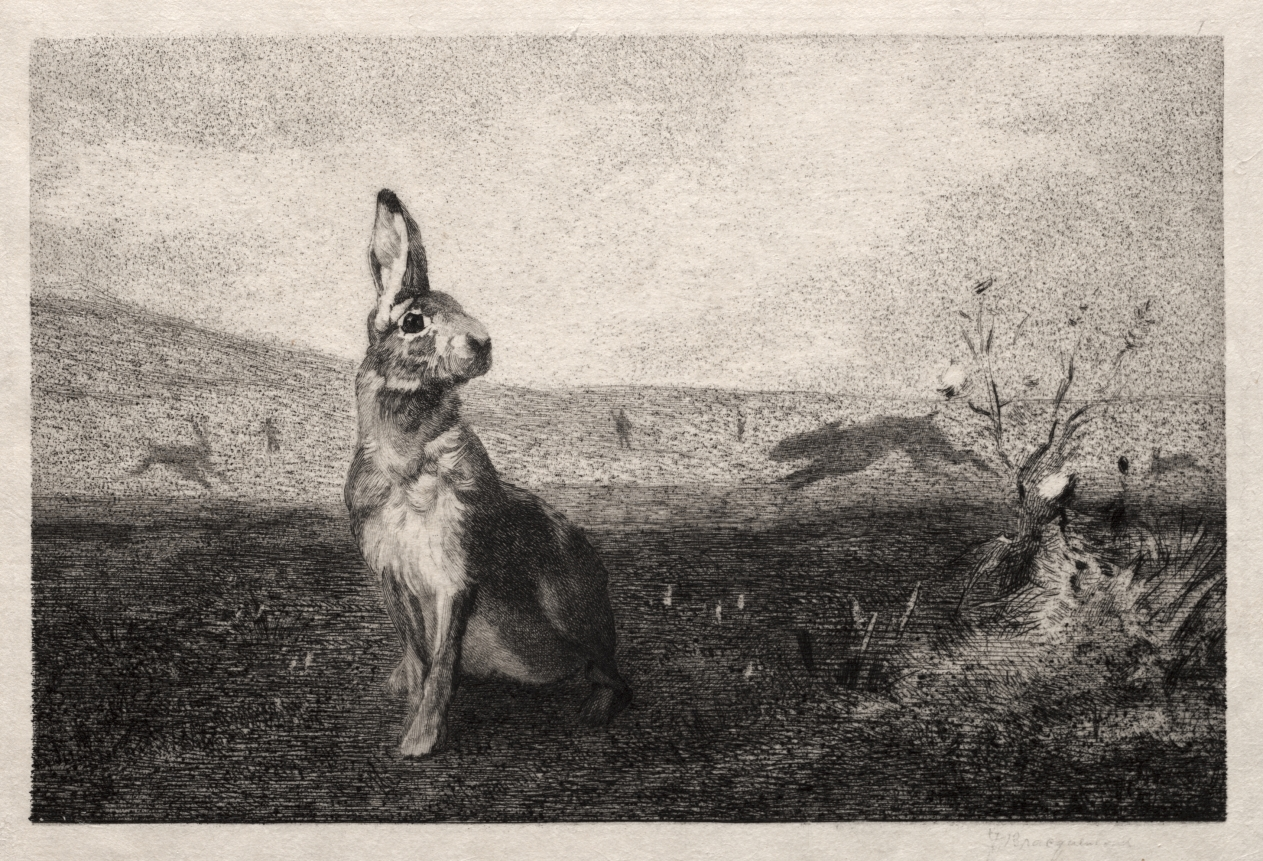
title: The Hare (after A. de Balleroy)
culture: France, 19th century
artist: Félix Bracquemond (French, 1833–1914)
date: 1865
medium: softground and drypoint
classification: Print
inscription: lower right, in pencil: F. Bracquemond